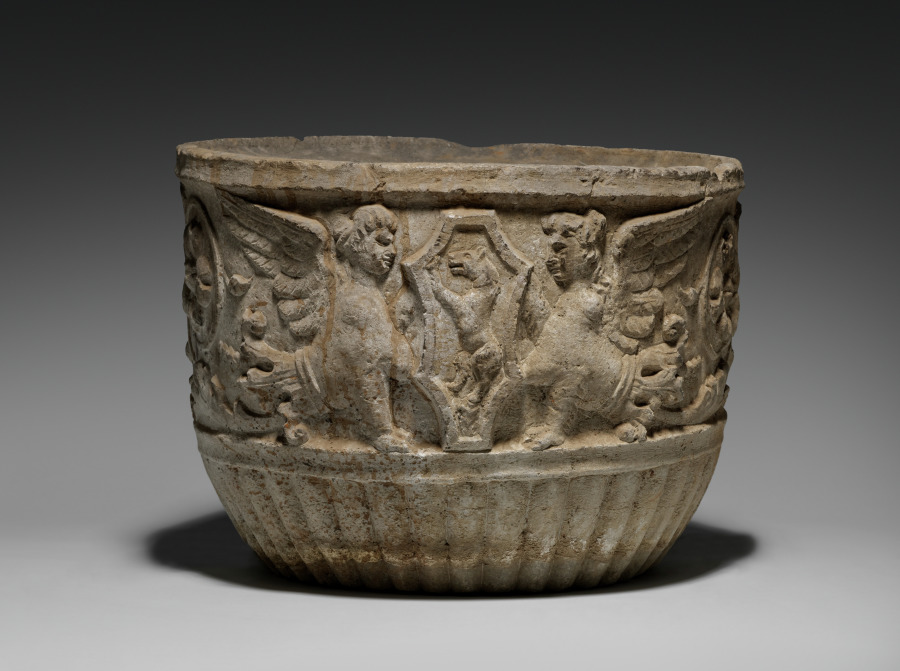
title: Garden Pot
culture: Italy, 19th century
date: 19th Century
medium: stone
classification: Miscellaneous